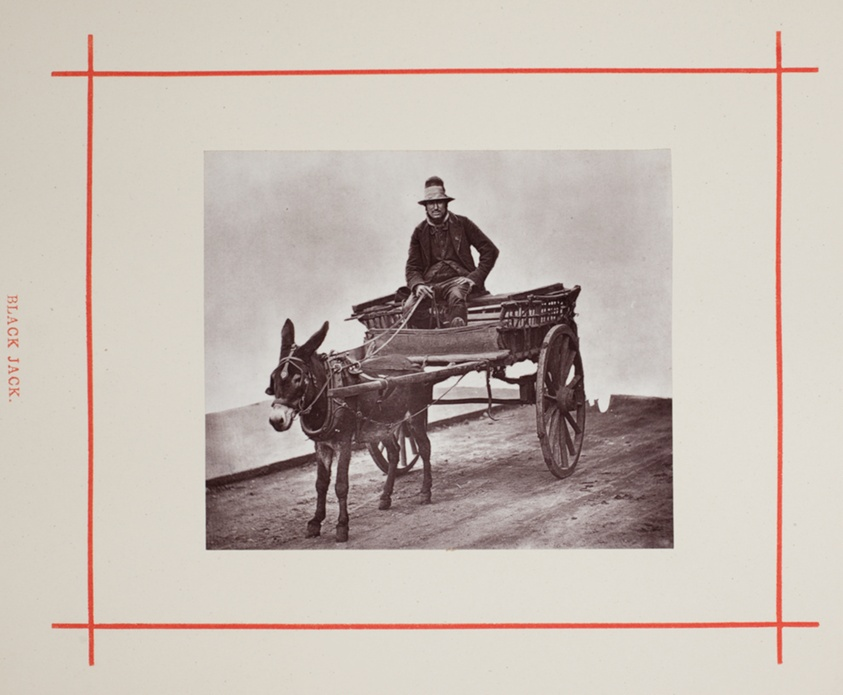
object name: Photograph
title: Black Jack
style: 19th century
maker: John Thomson (Scottish, 1837–1921)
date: 1877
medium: Woodburytype, from the album "Street Life in London"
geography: Scotland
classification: photograph; photography